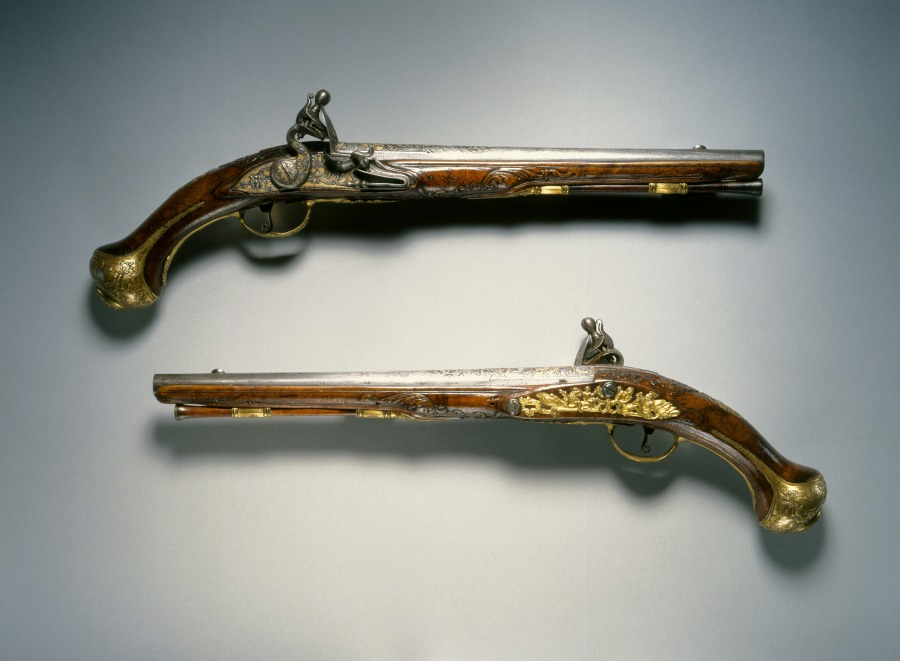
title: Pair of Flintlock Pistols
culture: Franco-Flemish, Liège, early 18th century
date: early 1700s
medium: steel with gold inlay, gilt-brass mounts; walnut burl stock; chiseled high-relief decoration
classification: Arms and Armor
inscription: G. MASSIN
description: Works of exquisite craftsmanship, this pair of pistols, on view in the museum’s armor court, feature an array of decorative elements, including carved walnut, gold inlay, and chiseled, engraved, and gilded figural designs. The barrel is signed G. MASSIN, the name of a gunsmith working in eastern France or French-speaking Flanders, possibly the city of Liège.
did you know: The flintlock ignition system was developed in the 1600s and remained the dominant system until the early 1800s.